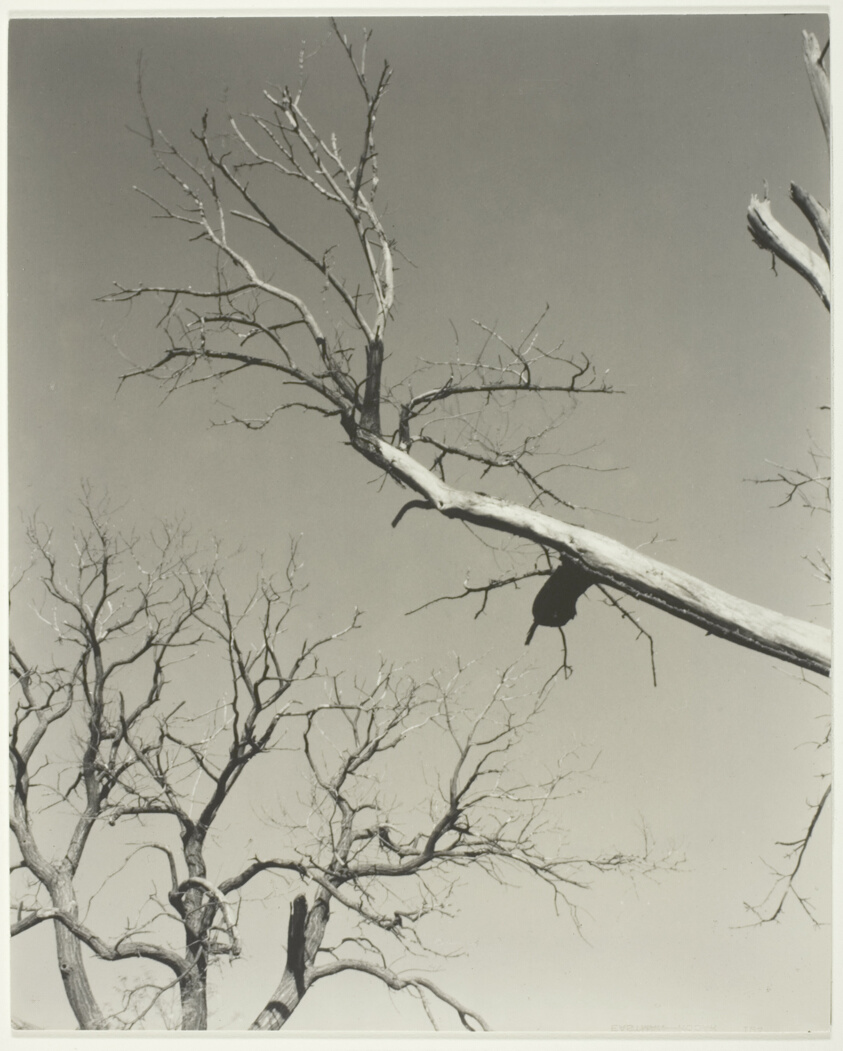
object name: Photograph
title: The Dying Chestnut Tree—My Teacher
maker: Alfred Stieglitz (American, 1864–1946)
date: 1927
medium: Gelatin silver print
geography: United States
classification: gelatin silver (developing-out-paper) pr; photographic process; photography; photograph